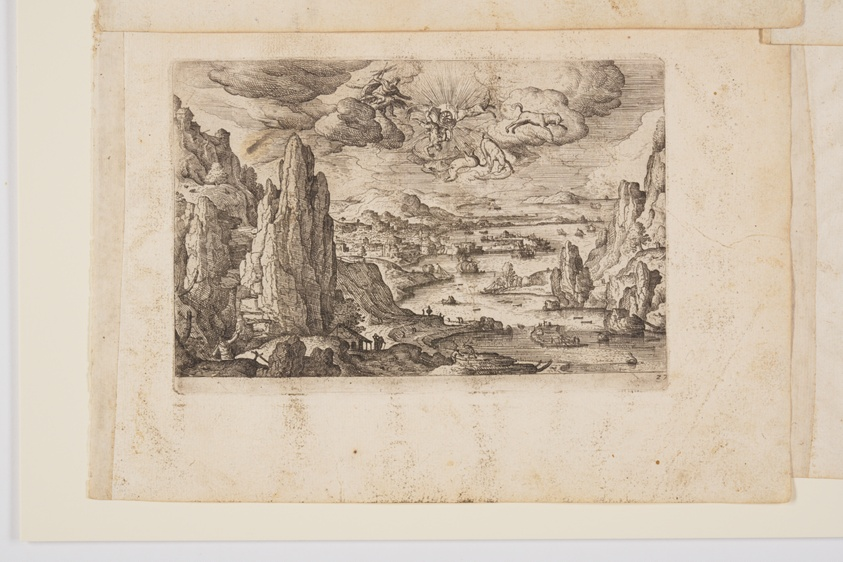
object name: Print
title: Plate 27, from Landscapes with Scenes from the Old and New Testament and Ovid’s Metamorphoses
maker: Hans Bol (Flemish, 1534–1593); published by Philip Galle (Flemish, 1537–1612)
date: 1574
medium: Etching on ivory laid paper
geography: Flanders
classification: print; paper; prints and drawing; etching